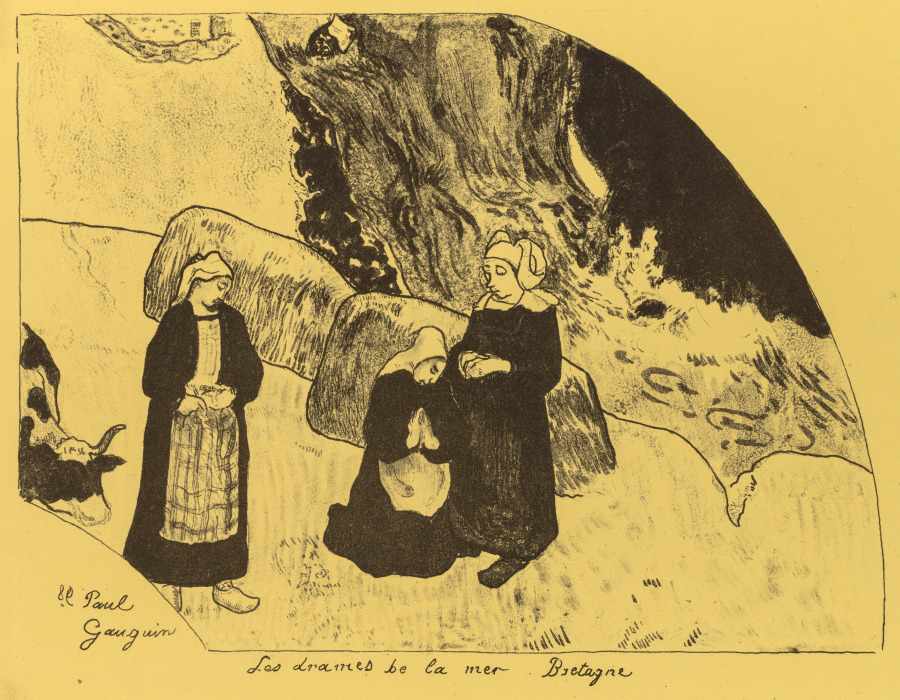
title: Volpini Suite: Dramas of the Sea: Brittany (Les Drames de la Mer, Bretagne)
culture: France, 19th century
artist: Paul Gauguin (French, 1848–1903)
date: 1889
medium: zincograph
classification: Print